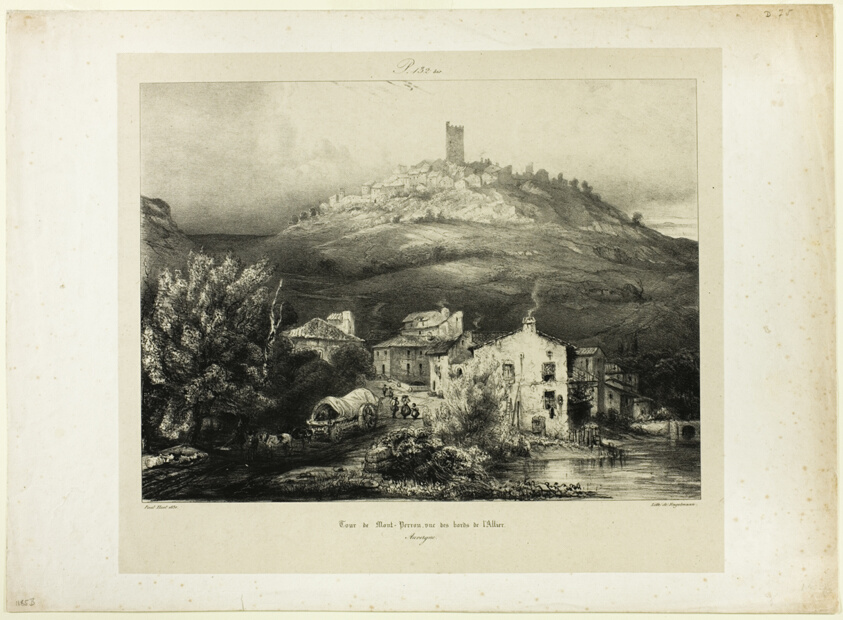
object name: Print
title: The Tower of Mont-Perrou, Seen from the Banks of the Allier (Auvergne)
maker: Paul Huet (French, 1803-1869); printed by Gottfried Engelmann (French, 1788-1839)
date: 1831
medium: Lithograph in black on buff China paper, laid down on cream wove paper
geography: France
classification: lithograph; print; prints and drawing